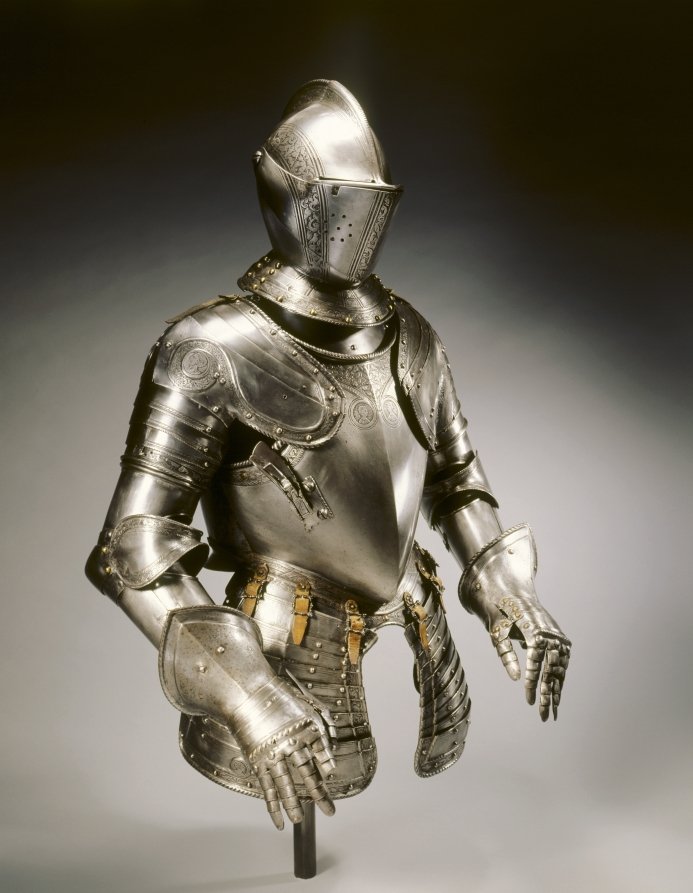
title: Half-Suit of Armor for the Field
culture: North Italy, Brescia (?), 16th century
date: c. 1575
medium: steel with etched decorative bands and roundels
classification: Arms and Armor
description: Decoration was critical to fine armor, and etching was the most commonly used technique. Here, the bands along the borders are etched. On the breastplate, pauldrons (shoulder guards), and tassets (hip and upper leg guards), etched medallions enclose profile busts reminiscent of ancient Roman portraits. The lance rest on the breastplate indicates that this half-suit was once part of a complete field armor for man and horse. The etching technique used for armor was developed in the late 1400s. The metal surface was first coated with an acid-resistant substance, such as wax or varnish. An etching needle was then used to scratch a design into the surface. The exposed areas were then treated with an acid that would "bite" or etch the lines into the metal. When the coating was removed, the etched design was blackened for contrast.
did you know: This is an example of raised field etching where the design stands out in slight relief from the background.